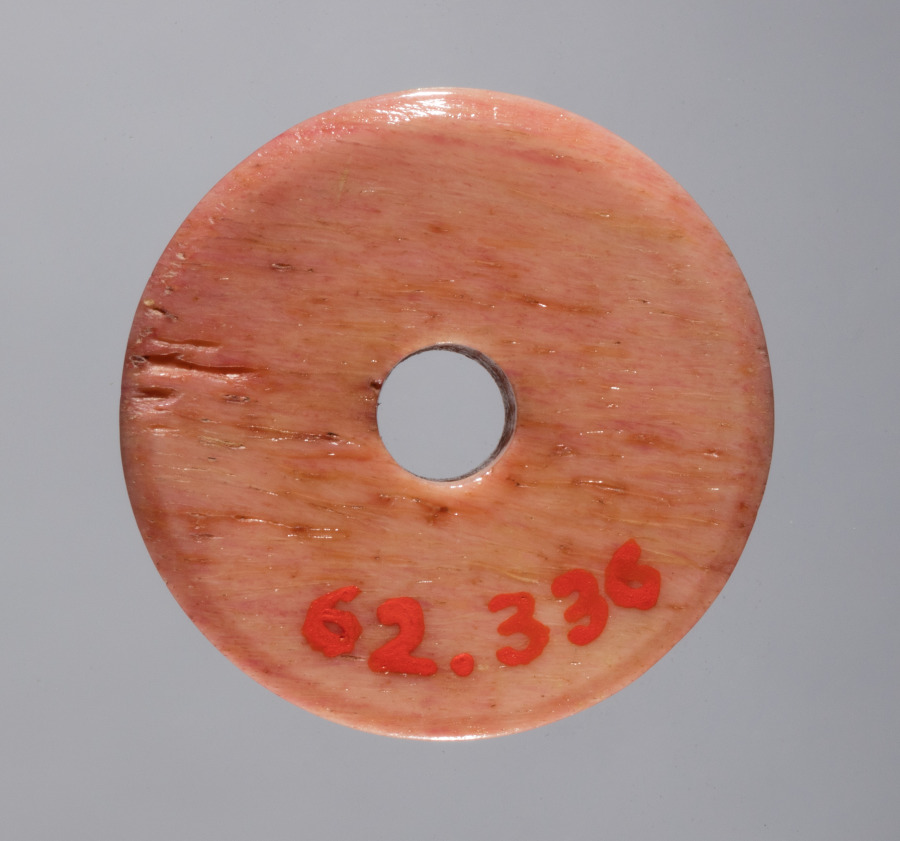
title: Spindle Whorl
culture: Iran, early Islamic period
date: 700s - 900s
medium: bone, incised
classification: Spindle Whorl